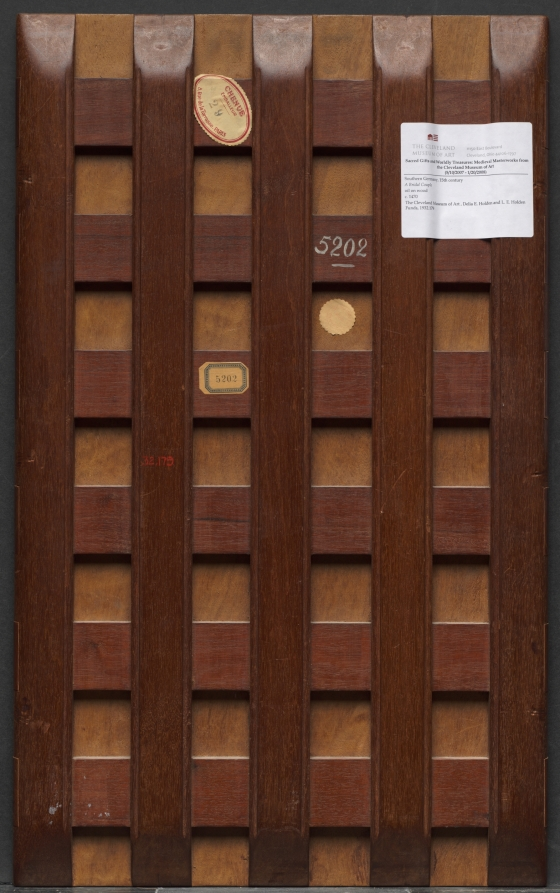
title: A Bridal Couple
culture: Southern Germany, 15th century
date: c. 1470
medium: oil on panel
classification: Painting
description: This painting depicting a recently married aristocratic couple is filled with symbolism. The various floral elements represent love and fertility, while the colors of their clothes suggest not only their relationship but also chastity, love, and modesty. What details might you choose to symbolize a young couple in love?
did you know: This painting inspired internationally renowned Finnish composer Kaija Saariaho to write a piece of music titled "Orion" after she visited the museum.